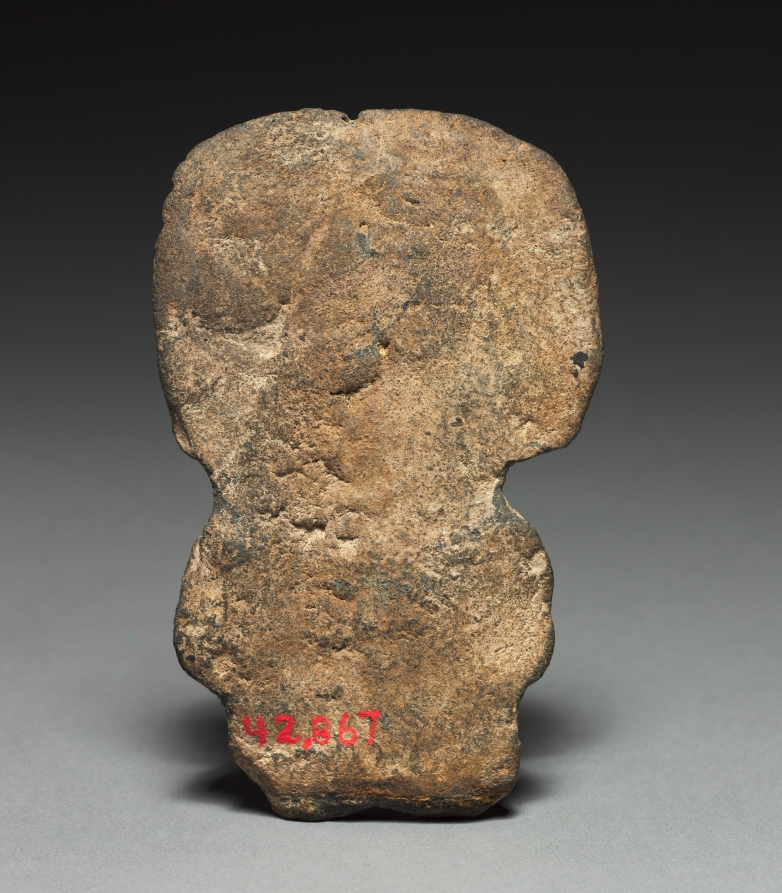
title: Idol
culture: Mexico, Oaxaca, La Mixteca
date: before 1942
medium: terracotta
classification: Sculpture